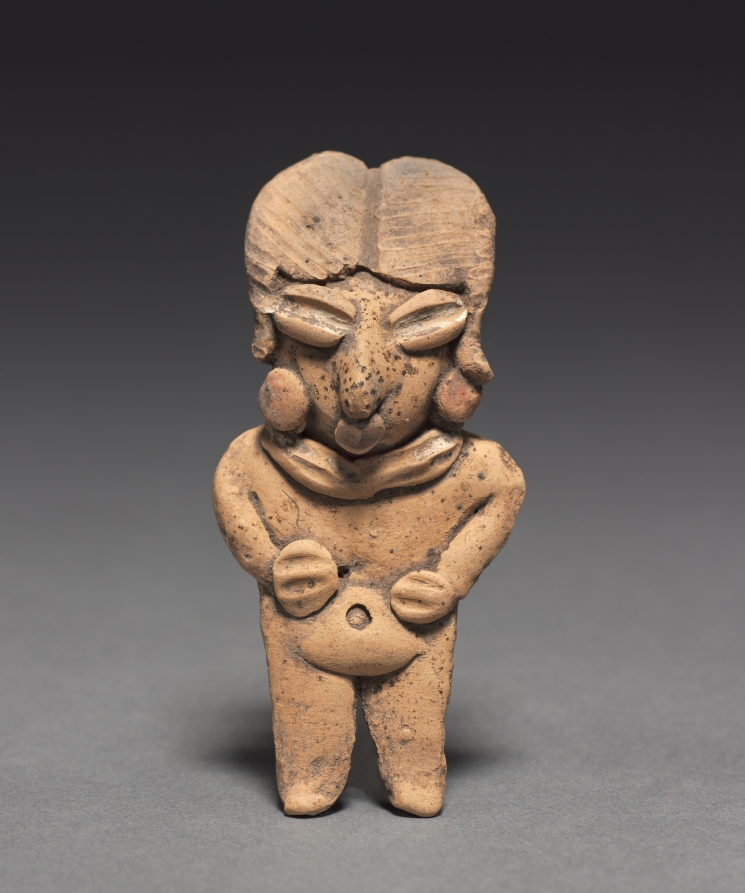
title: Male Figurine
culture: Mesoamerica, Mexico, Guanajuato, Chupícuaro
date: 400–100 BCE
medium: pottery with white and red pigment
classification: Sculpture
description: The Chupícuaro culture, located north of Mexico City in the state of Guanajuato, created a distinctive ceramic tradition including small clay figurines. This example is said to belong to a group of ten figurines from the same burial or cache (1990.145–154). The group includes both males and females that can be sorted into couples based on size.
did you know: Groups of figurines were sometimes arranged in scenes and likely used in household rituals.